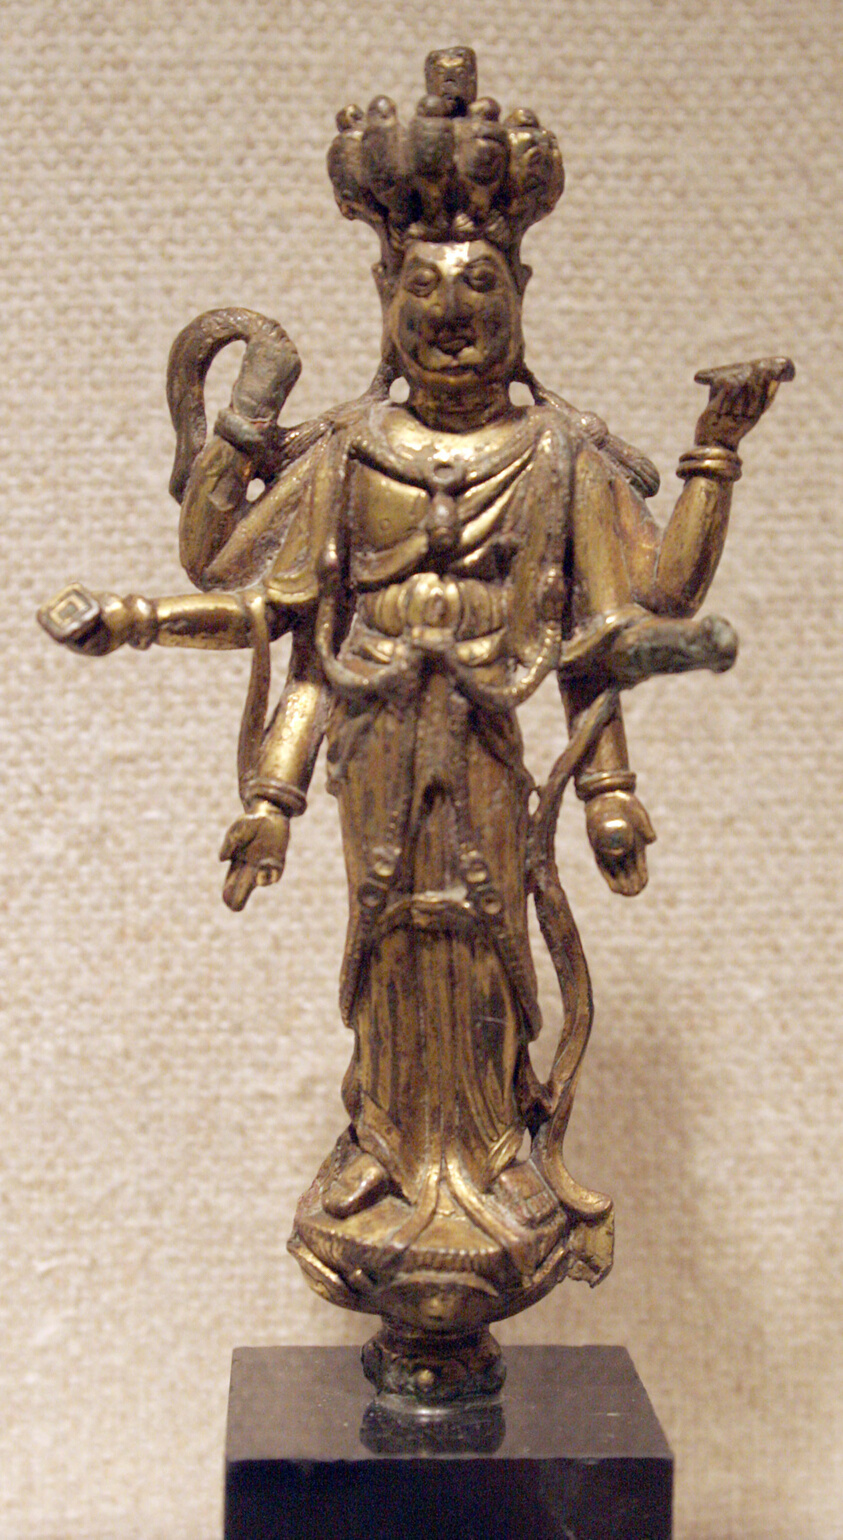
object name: Religious/Ritual Object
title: Eleven-Headed and Six-Armed Guanyin (Avalokiteshvara) Standing on a Lotus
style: Chinese (culture or style)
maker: China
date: Tang dynasty (618–907), c. 9th century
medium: Gilt copper alloy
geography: China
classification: bronze; metal; sculpture; asian art; ritual objects